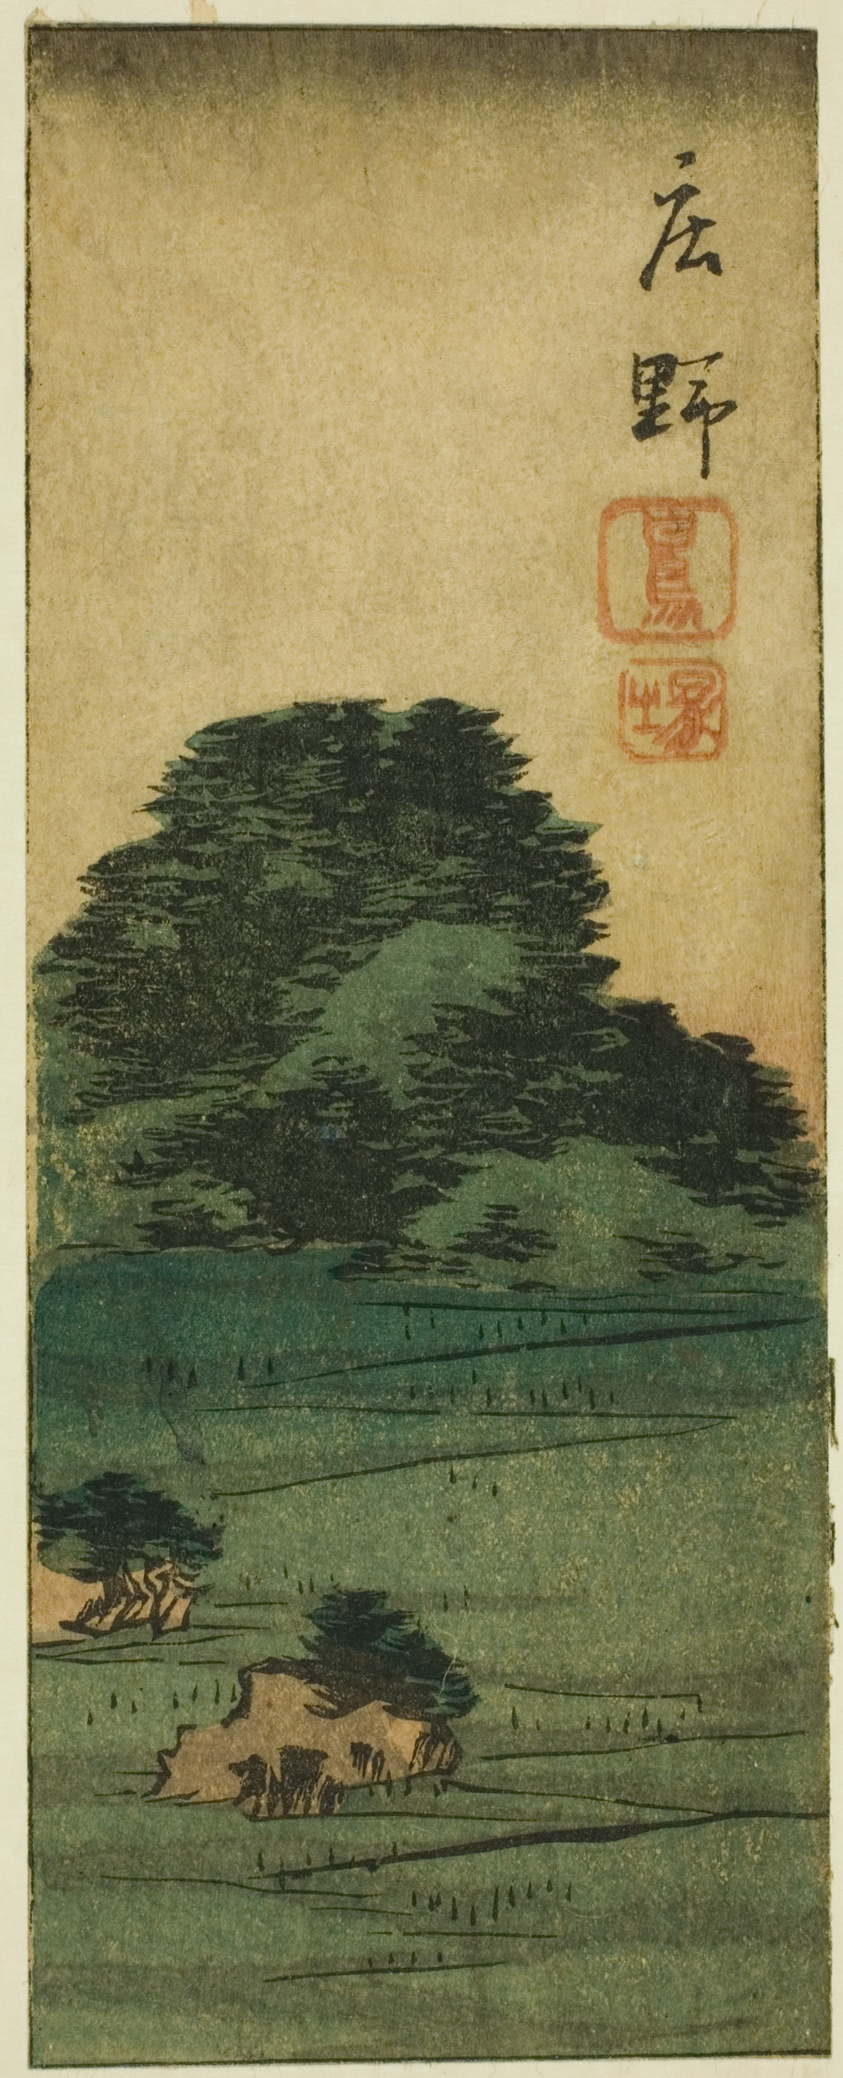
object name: Print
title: Shono: Shiratori Mound (Shono, Shiratorizuka), section of sheet no. 12 from the series "Cutouts of the Fifty-three Stations (Gojusan tsugi harimaze)"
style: Japanese (culture or style)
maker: Utagawa Hiroshige 歌川 広重; Japanese, 1797-1858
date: 1852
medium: Color woodblock print; section of harimaze sheet (uncut sheet: 1939.1297)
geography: Japan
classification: woodblock print; print; asian art